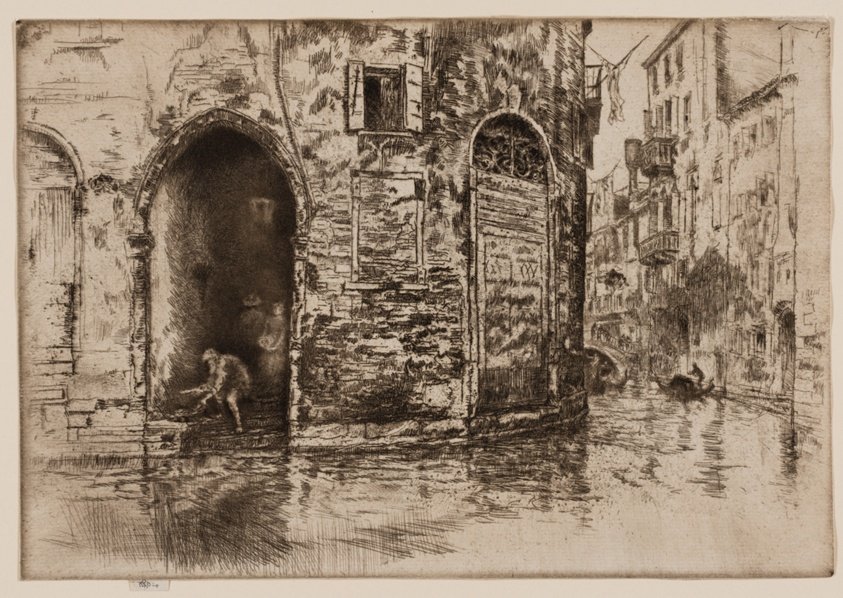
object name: Print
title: The Two Doorways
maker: James McNeill Whistler (American, 1834-1903)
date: 1879/80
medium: Etching and drypoint with foul biting in dark brown ink on off-white laid paper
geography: United States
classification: etching; print; prints and drawing; drypoint; foul biting; paper